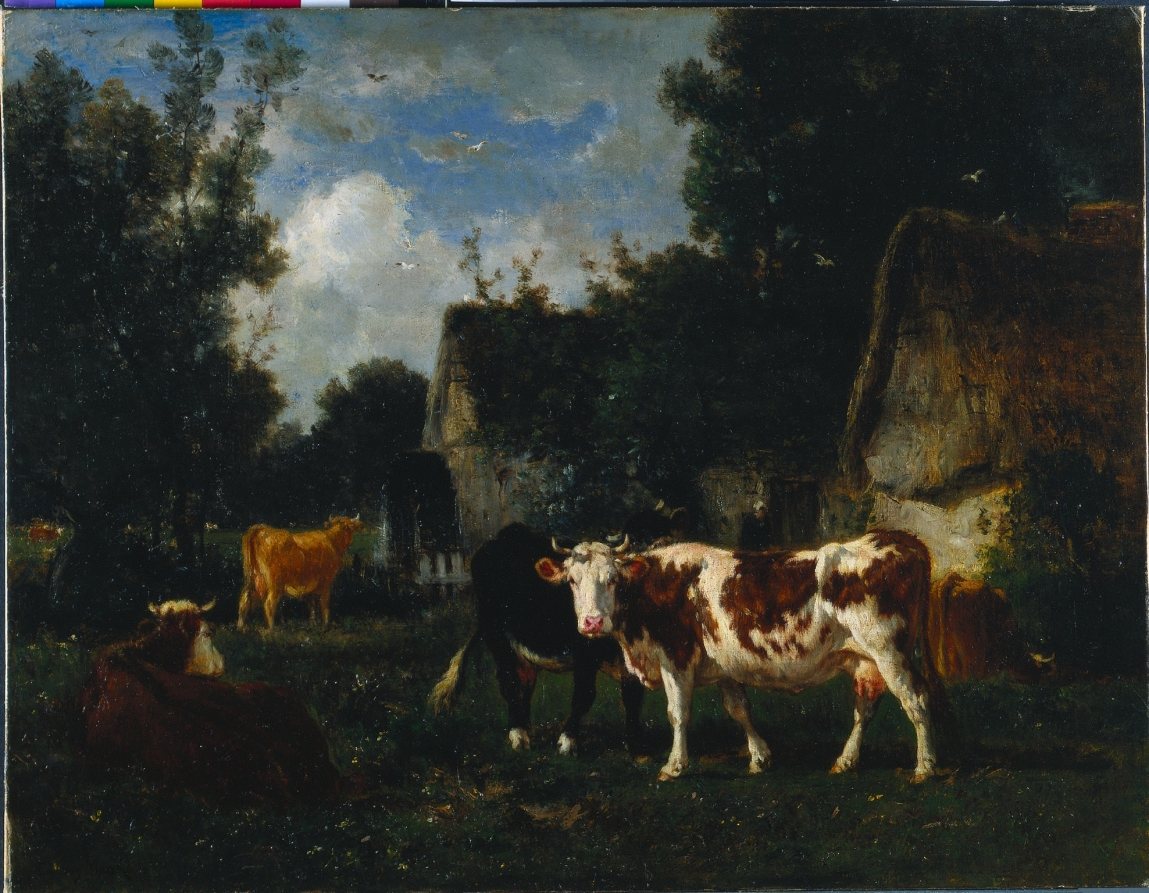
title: The Mill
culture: France, 19th century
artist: Émile van Marcke (French, 1827–1890)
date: 1873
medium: oil on fabric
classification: Painting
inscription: Signed lower left: Em van Marcke